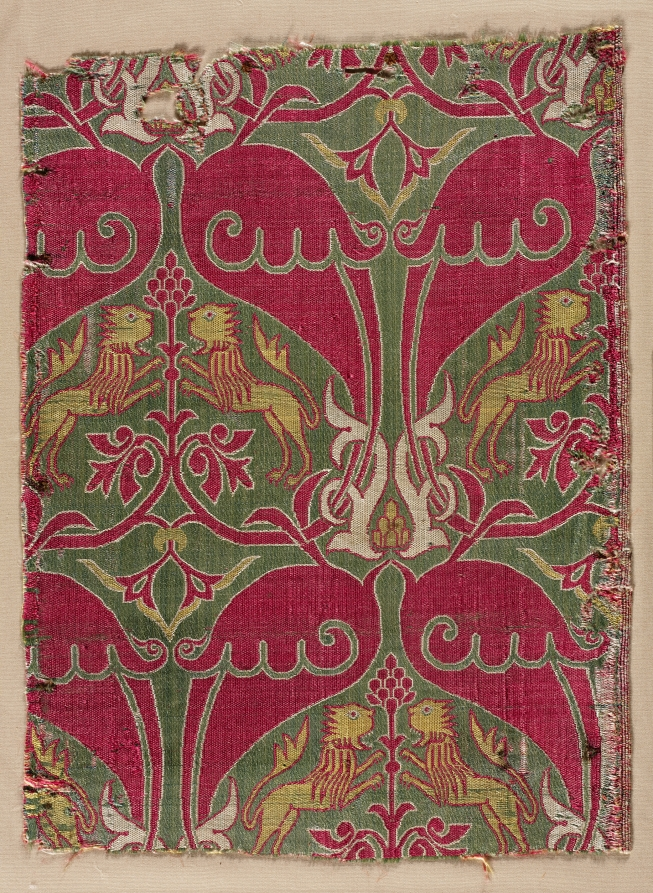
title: Lampas with rampant lions, palmettes, and escutcheons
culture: Spain, Granada, Nasrid period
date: 1400s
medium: lampas: silk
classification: Textile